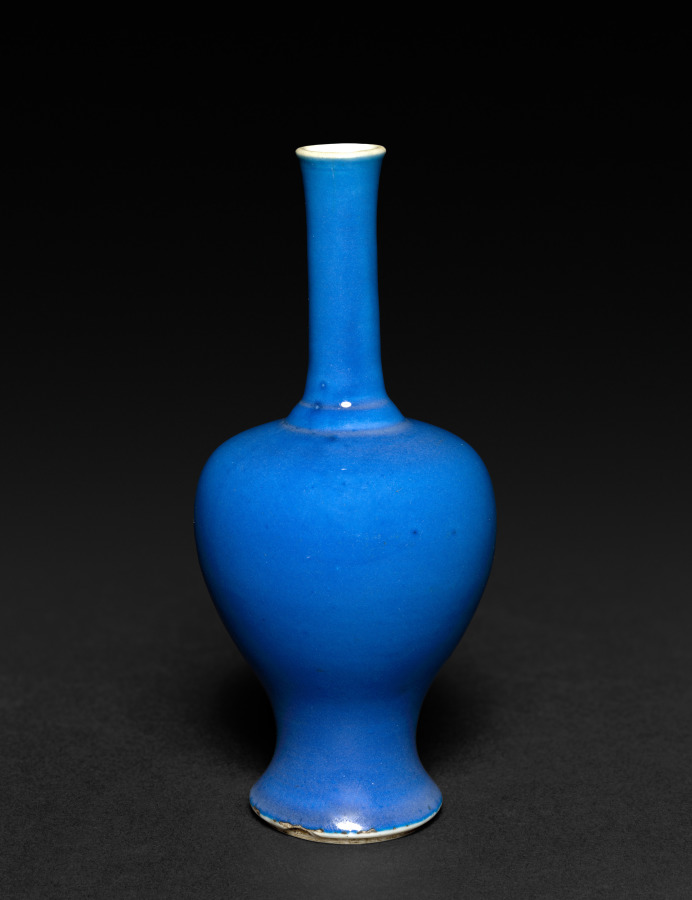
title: Miniature Vase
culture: China, Qing dynasty (1644-1911), Kangxi reign (1662-1722)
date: 1662–1722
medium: porcelain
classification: Ceramic